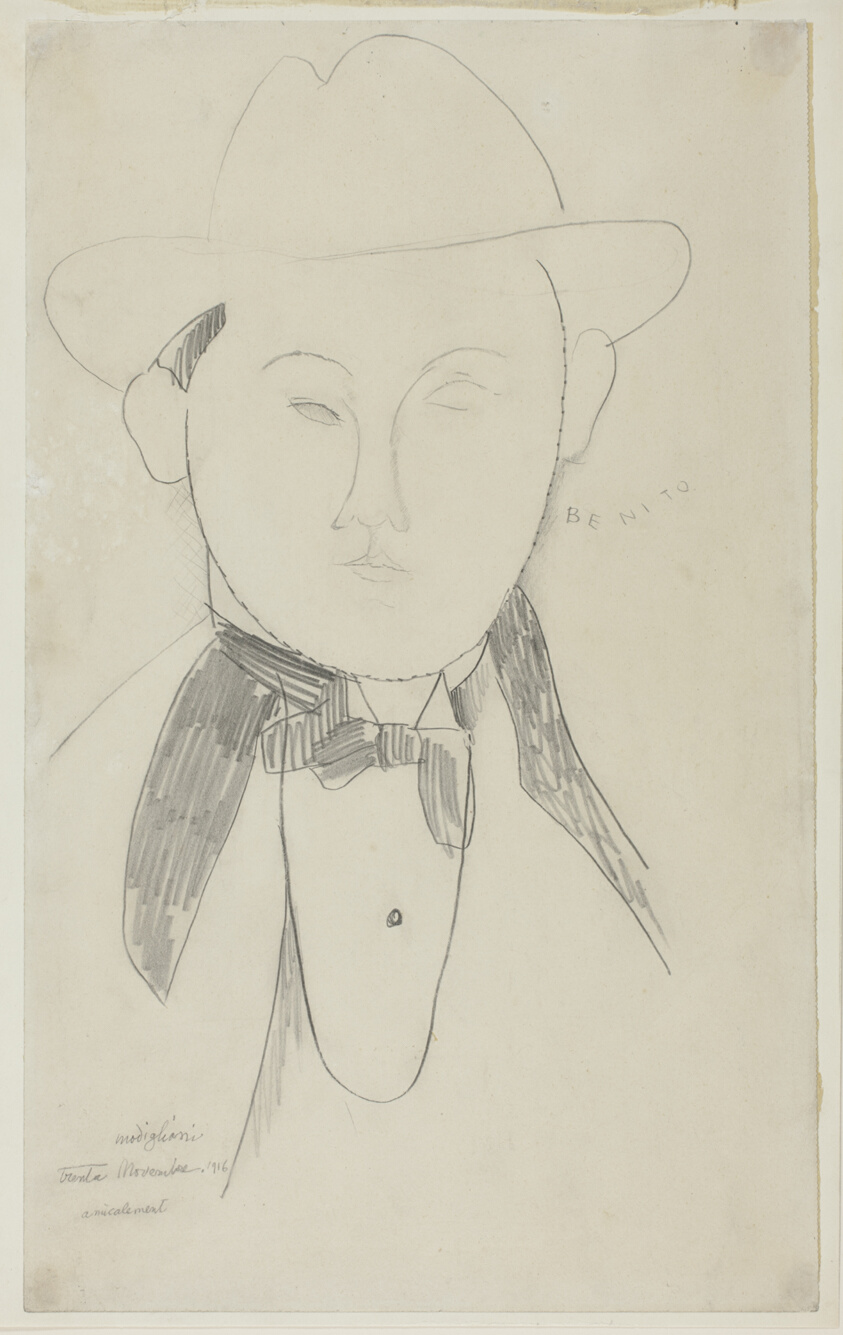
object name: Drawing and Watercolor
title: Benito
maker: Amedeo Modigliani (Italian, 1884-1920)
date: 1916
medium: Graphite on ivory wove paper, dry-mounted to ivory wove card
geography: Italy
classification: graphite; drawings (visual works); prints and drawing